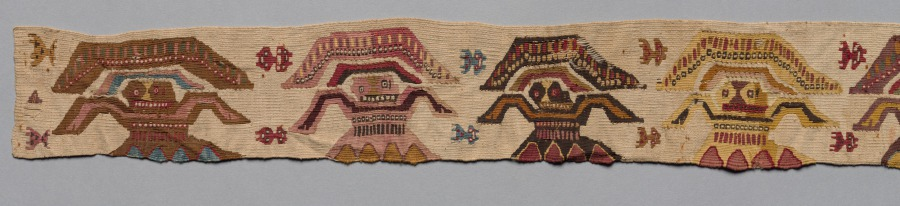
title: Lower Border of a Garment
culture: Central Andes, North Coast, Chimú or Lambayeque (Sican) People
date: 1000–1470s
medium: tapestry; wool and cotton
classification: Textile